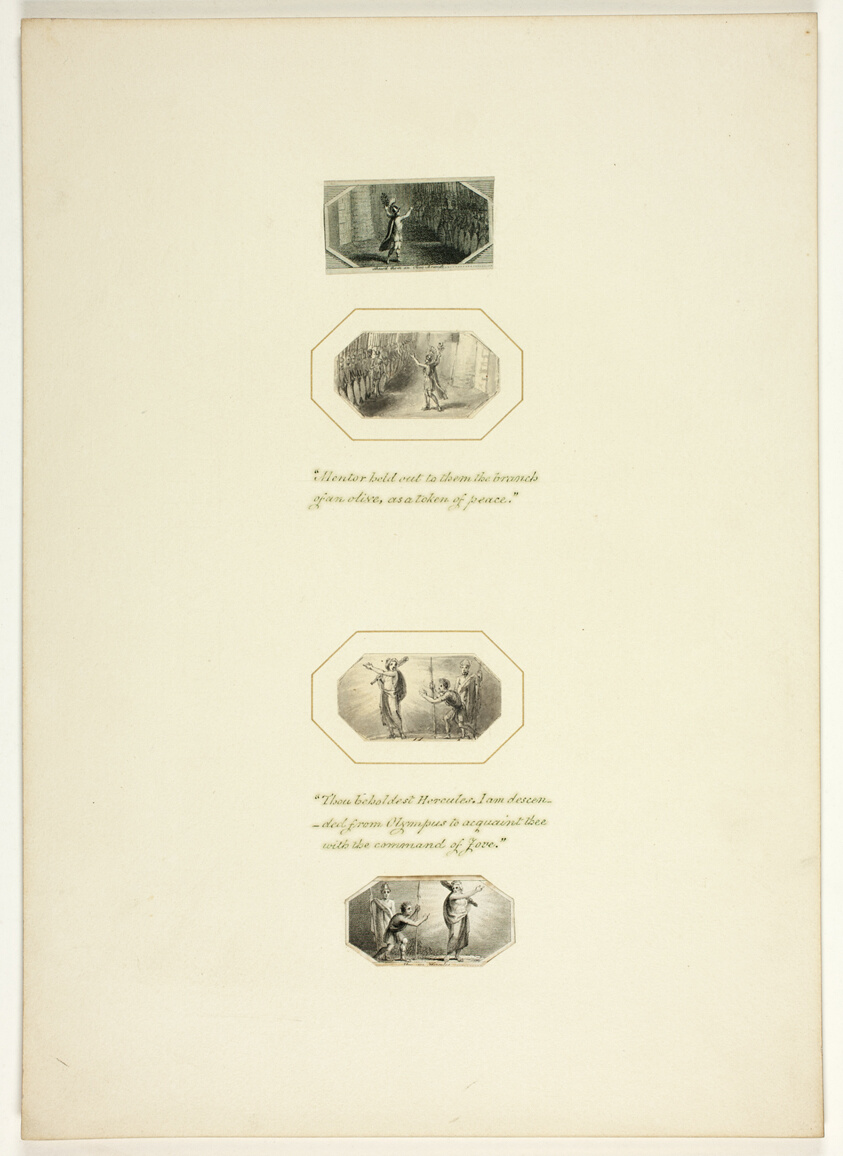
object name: Drawing and Watercolor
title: Study for a plate from Telemachus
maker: Thomas Stothard (English, 1755-1834)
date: c. 1797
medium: Ink wash on paper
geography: England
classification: ink or chalk wash; drawings (visual works); prints and drawing